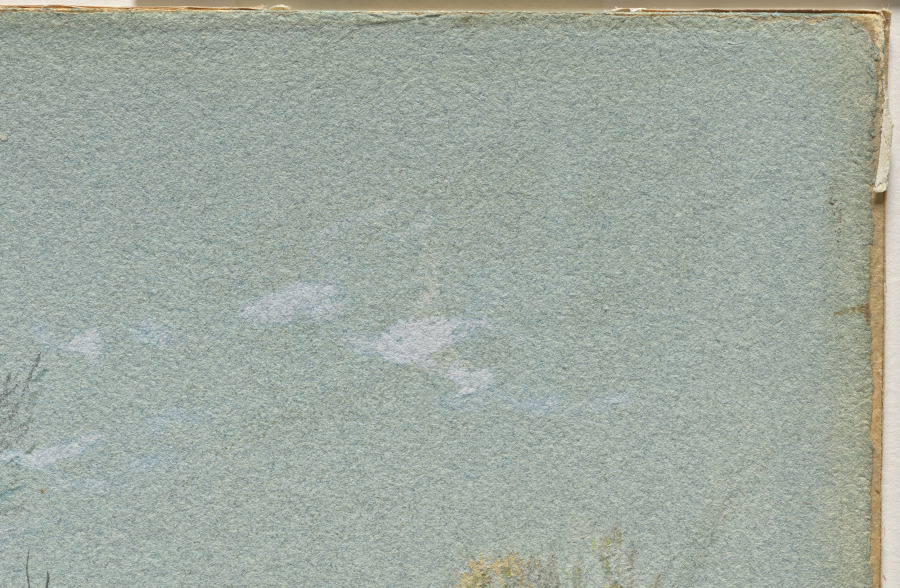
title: Traunstein River on the Road to Empfig, Bavaria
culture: American, 19th century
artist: William Stanley Haseltine (American, 1835–1900)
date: c. 1893–96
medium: Watercolor and gouache on blue paper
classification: Drawing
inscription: Initialed, lower left, in watercolor: WSH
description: In this watercolor, William Stanley Haseltine portrayed the calm shore of the Traunstein River, Bavaria, on a summer afternoon. A member of the Hudson River School and a practitioner of Luminism, Haseltine focused on atmosphere and reflection rather than a grand vista. His transparent washes and areas of opaque watercolor over blue paper create the effect of light skipping across the water.